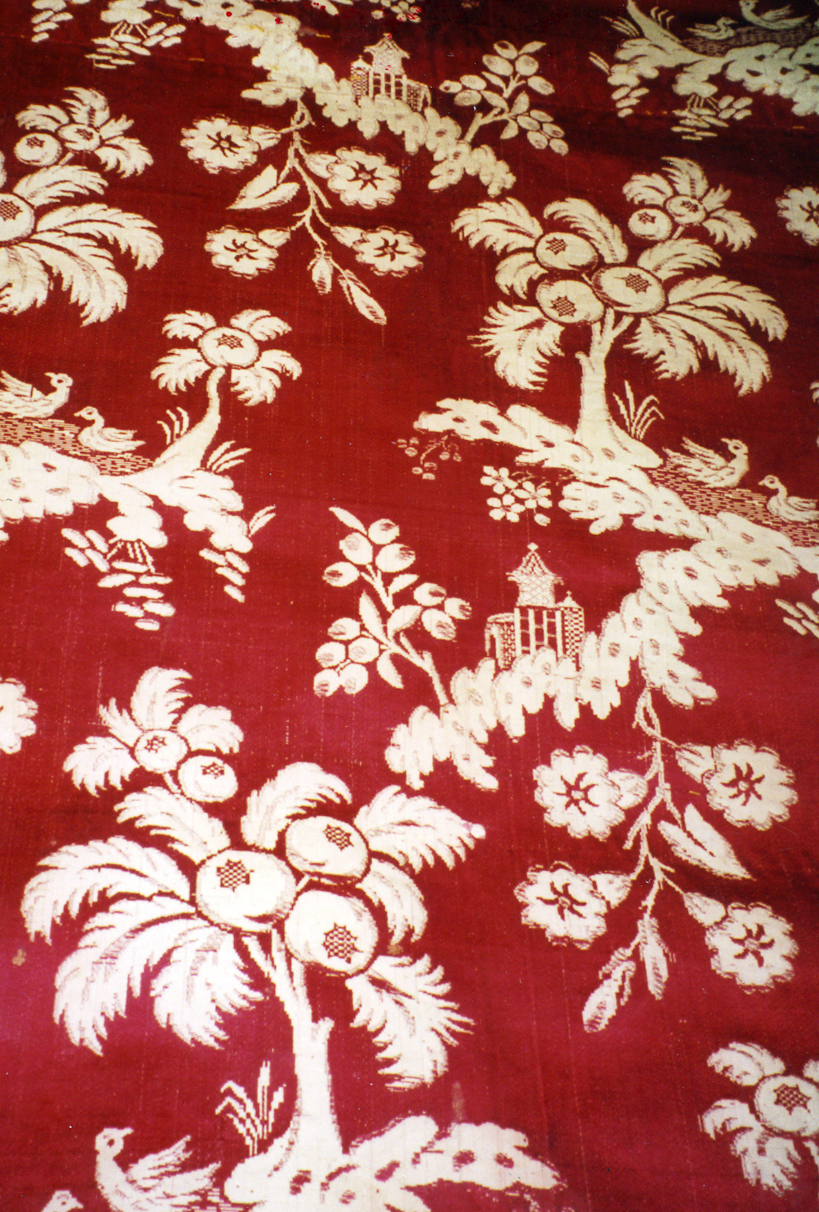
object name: Textile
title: Panel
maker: France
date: Mid–18th century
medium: Silk, warp-float faced 7:1 satin weave with weft-float faced 1:3 'S' twill and plain interlacings of secondary binding warps, supplementary patterning wefts, and self-patterning ground wefts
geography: France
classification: textile; weaving